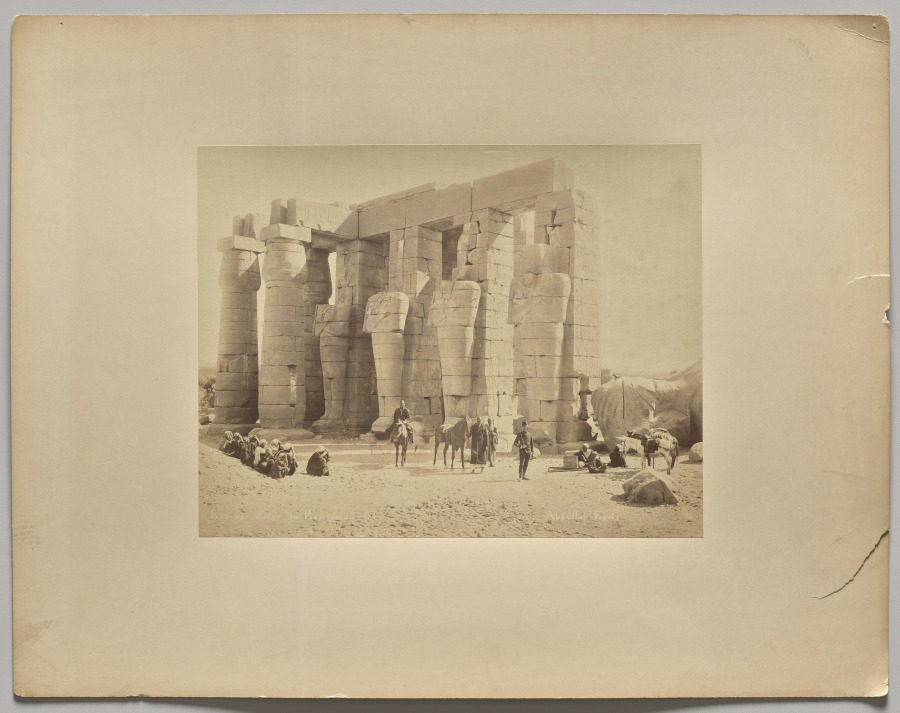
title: Les cariatides du Ramesseum 134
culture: Turkey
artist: Abdullah Frères (Turkish, 1858–1899)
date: 1860–80s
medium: albumen print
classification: Photograph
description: This photograph of the ruins of the memorial temple of Egyptian pharaoh Ramesses the Great was produced by Abdullah Frères, a studio run by three brothers. Based in Istanbul, it was the most celebrated photographic studio in the Ottoman Empire. This depiction of the sculptures of Osiris and the pharaoh echoes and complements views of these sculptures by British photographer Francis Frith (1992.236) and French photographers Henri Béchard (2006.118) and Adolphe Braun (1992.244).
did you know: While Britain maintained a significant military and commercial presence in Egypt in the nineteenth century, the country was ruled by the Ottoman Empire.